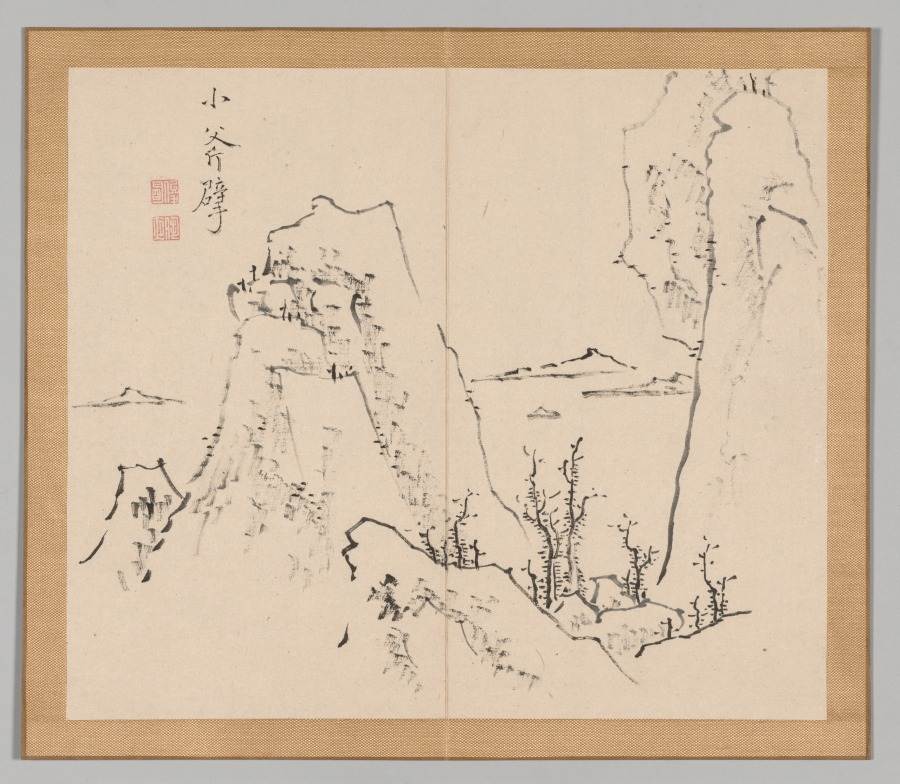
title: Reverberations of Taiga, Volume 1 (leaf 8)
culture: Japan, Edo period (1615–1868)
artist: Aoki Shukuya (Japanese, d. 1802)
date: mid- to late 1700s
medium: double-leaf from a pair of albums; ink and light color on paper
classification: Portfolio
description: Traditionally, young painters in Japan began their studies with an established master-painter. The master's compositions invariably became models that the apprentice copied to learn various ink and brush techniques. Shukuya was a pupil of the famous Kyoto artist Ikeno Taiga, whose style is reflected in these sketches of rocks, trees, and mountains.